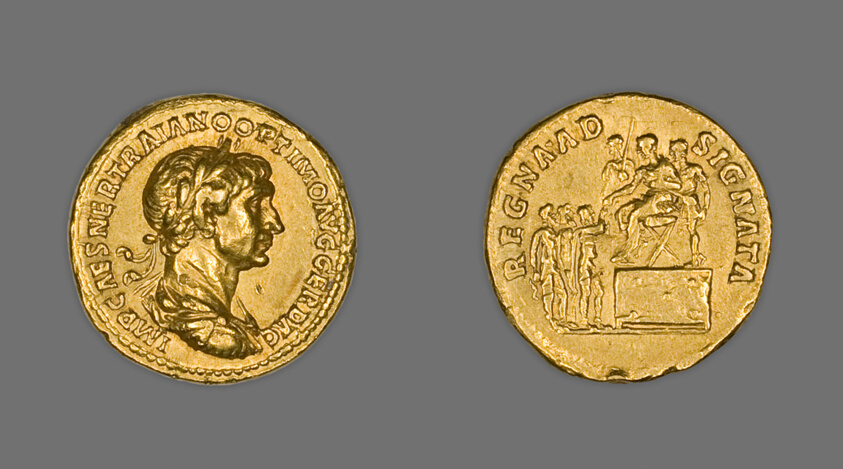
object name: Coin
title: Aureus (Coin) Portraying Emperor Trajan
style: trajanic, ancient, imperial (roman)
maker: Roman; minted in Rome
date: 114-115, issued by Trajan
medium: Gold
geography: Rome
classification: coin; ancient art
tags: portraits